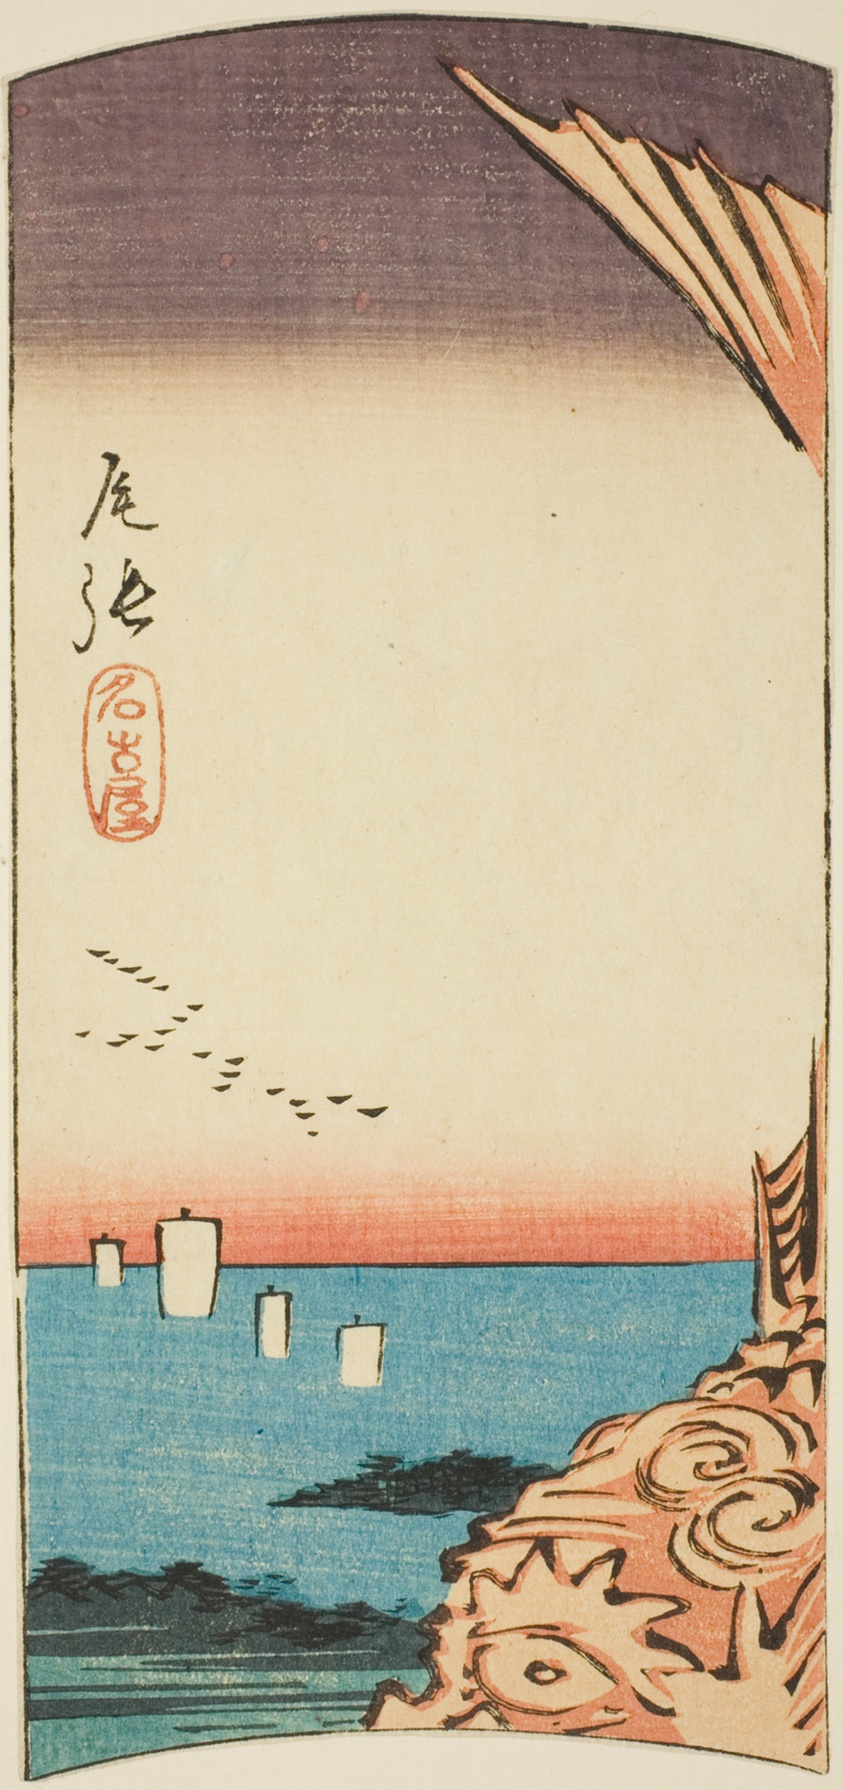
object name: Print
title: Nagoya in Owari Province, section of sheet no. 4 from the series "Cutout Pictures of the Provinces (Kunizukushi harimaze zue)"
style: Japanese (culture or style)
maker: Utagawa Hiroshige 歌川 広重; Japanese, 1797-1858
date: 1852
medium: Color woodblock print; section of harimaze sheet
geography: Japan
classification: woodblock print; print; asian art